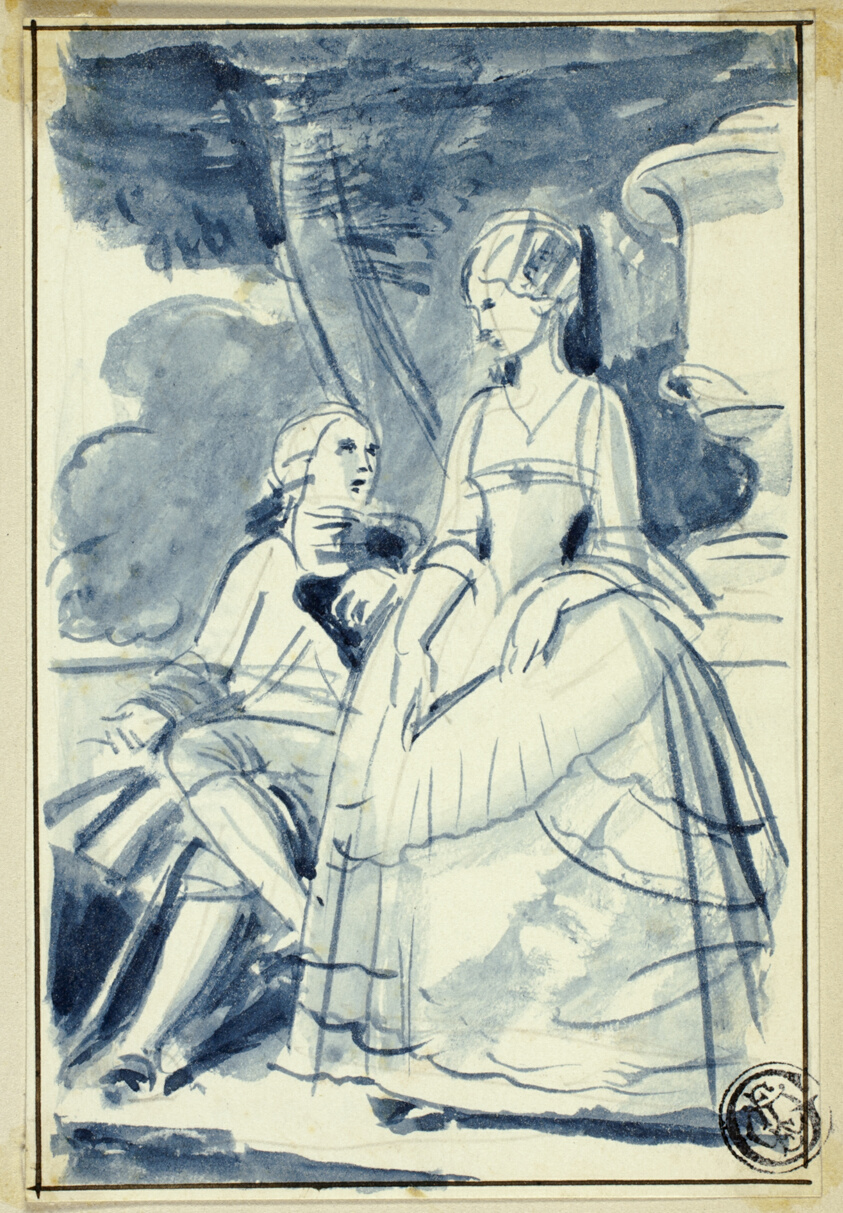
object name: Drawing and Watercolor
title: Man and Woman in 18th Century Dress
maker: William Edward Frost (English, 1810-1877); or after Thomas Stothard (English, 1755-1834)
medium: Pen and blue ink, and brush and blue wash, on ivory wove paper, tipped on cream wove paper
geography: England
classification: ink or chalk wash; drawings (visual works); prints and drawing